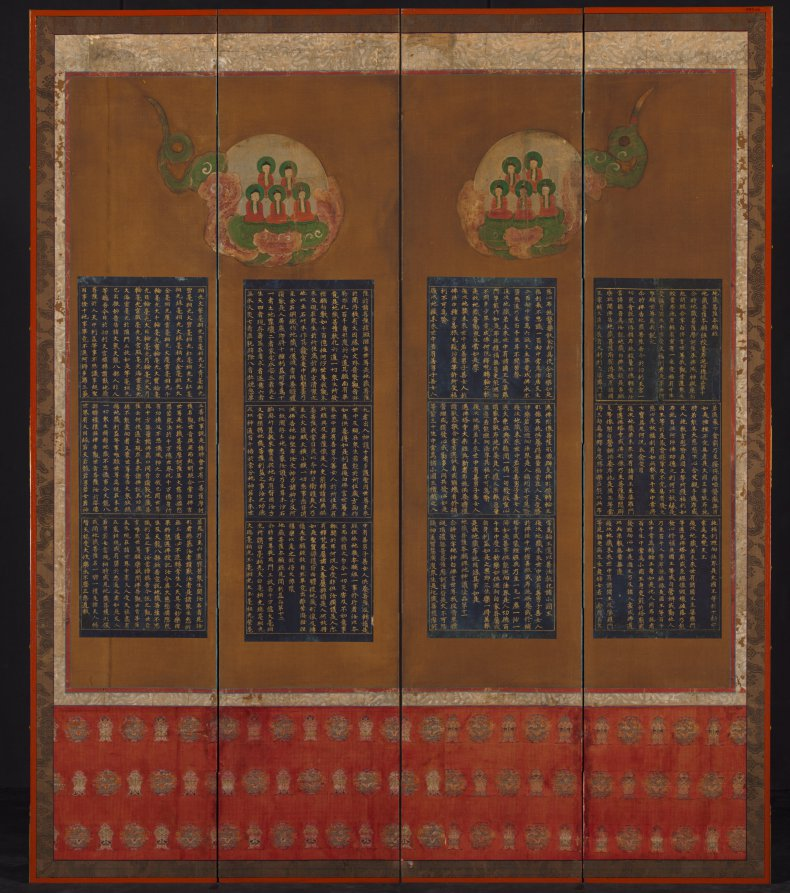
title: Buddhist Deities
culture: Korea, Joseon dynasty (1392–1910)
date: 1700s–1800s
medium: Four-panel folding screen; ink and color on silk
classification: Painting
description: This painting is a fragment of a much larger banner painting, now preserved by mounting on a four-panel continuous folding screen. On the back are Buddhist sutra pages, with text written in gold ink on indigo dyed paper.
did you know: This painting is a fragment of a much larger banner painting.